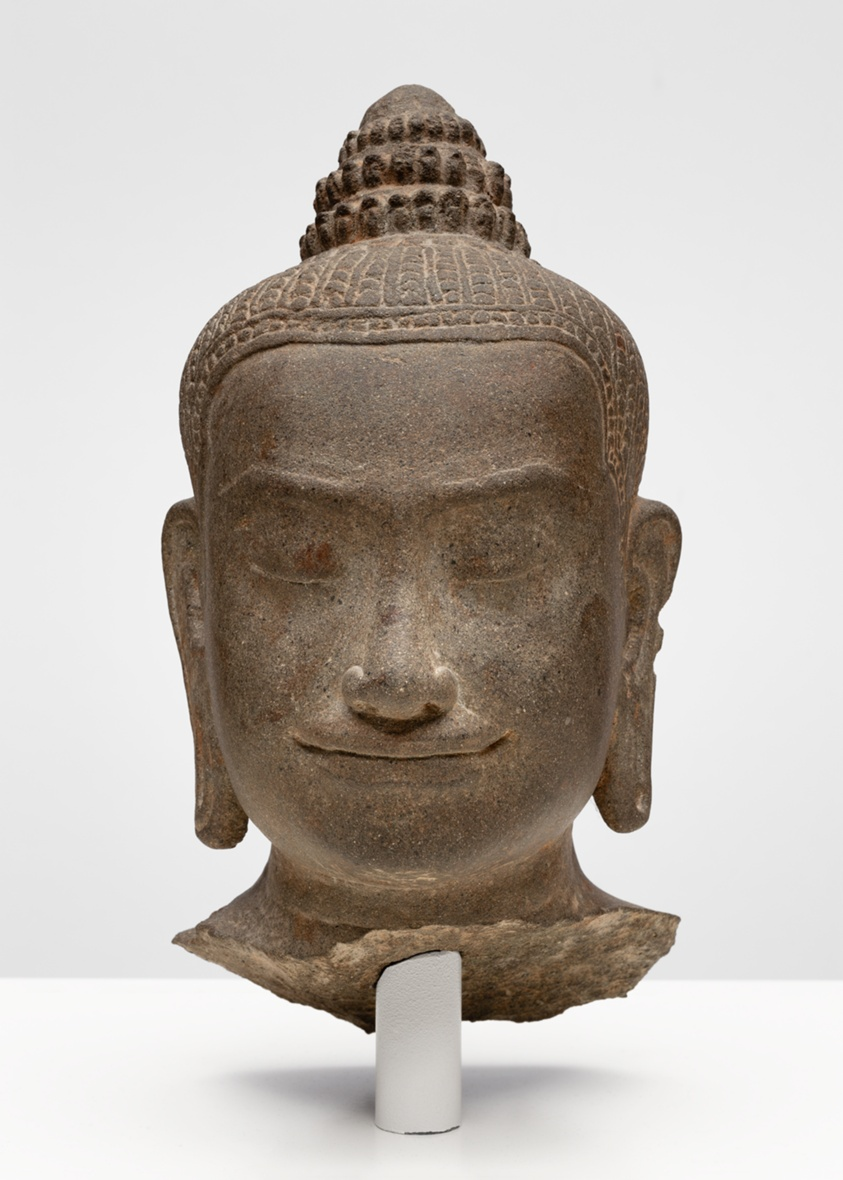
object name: Sculpture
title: Head of a Buddhist Deity, Possibly Prajnaparamita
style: Southeast Asian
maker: Cambodia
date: Angkor period, late 12th/early 13th century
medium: Sandstone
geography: Cambodia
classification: stone (unidentified); stone; sculpture; asian art